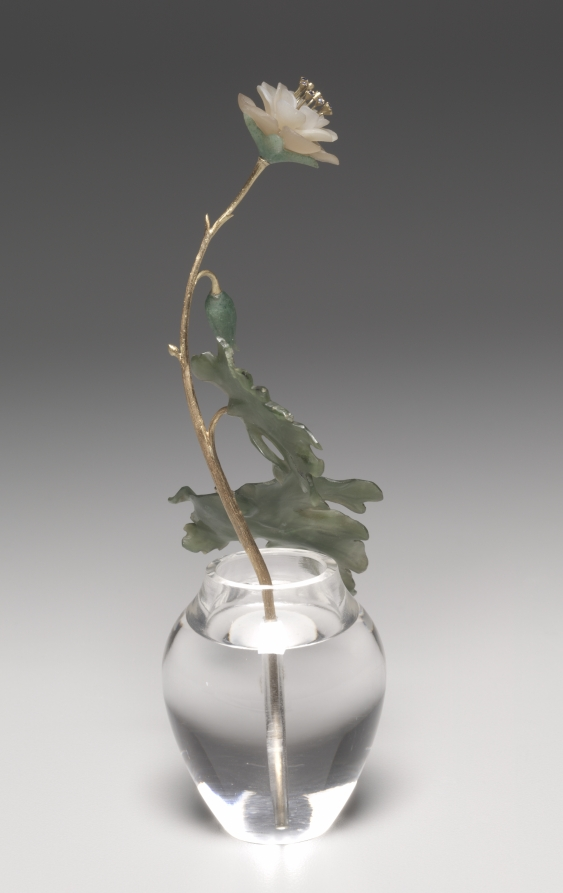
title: Flower Study of an Anemone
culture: Russia, St. Petersburg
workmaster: Henrik Wigström (Russian, 1862–1923)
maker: House of Fabergé (Russian, 1842–1918)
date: c. 1905–15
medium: mat white stone, gold, sapphires, jade, rock crystal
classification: Miscellaneous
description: This flower study depicts a wild anemone in bloom. Fabergé’s inspiration for his flower studies is said to have come from the floral brooches of precious stones that were made in the 1700s for Catherine the Great as well as from the Japanese art of flower arranging, known as ikebana. Small and delicate, Fabergé’s flower studies were given as intimate gifts to friends by the tsarina and others in the court. She also liked to take them around to wherever the imperial family was residing as a reminder of spring during the harsh Russian winters.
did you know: The stems of Fabergé’s flower studies are set into little basins carved from rock crystal to resemble pots of water.